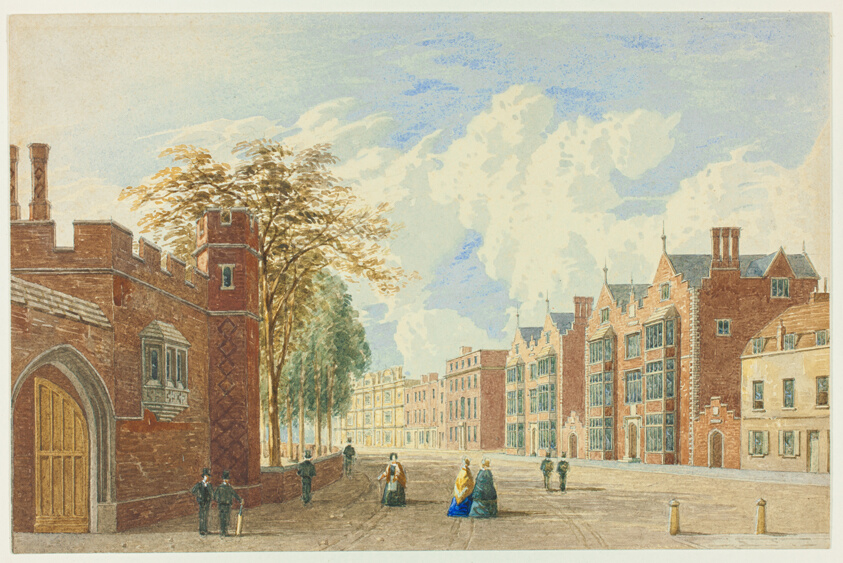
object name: Drawing and Watercolor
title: High Street, Eton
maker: George Pyne (English, 1800-1884)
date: c. 1845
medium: Watercolor heightened with white gouache over graphite on cream wove paper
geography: England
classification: watercolor; drawings (visual works); prints and drawing